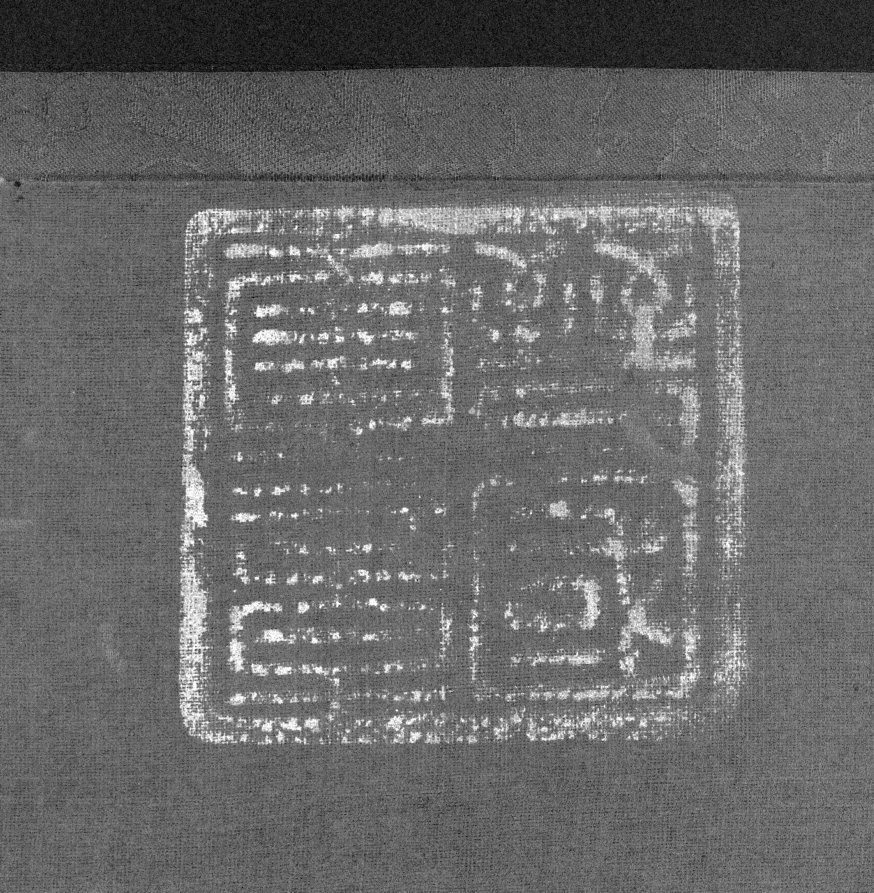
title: Birds in a Grove in a Mountainous Winter Landscape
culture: China, Jin dynasty (1115-1234)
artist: possibly by Gao Tao (Chinese, 1100s)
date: 1100s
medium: hanging scroll; ink and slight color on silk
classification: Painting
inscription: A signature and a seal at lower left edge: Gao Tao 高燾; seal undecipherable. 10 additional seals: 1 of Zhu Gang 朱棡 [1358–1398]; 3 of Suo’etu 索額圖 [1636–1703]; 2 of A’erxipu 阿爾喜普 [1700s]; 1 of Weng Fanggang 翁方綱 [1733–1818]; 3 unidentified.